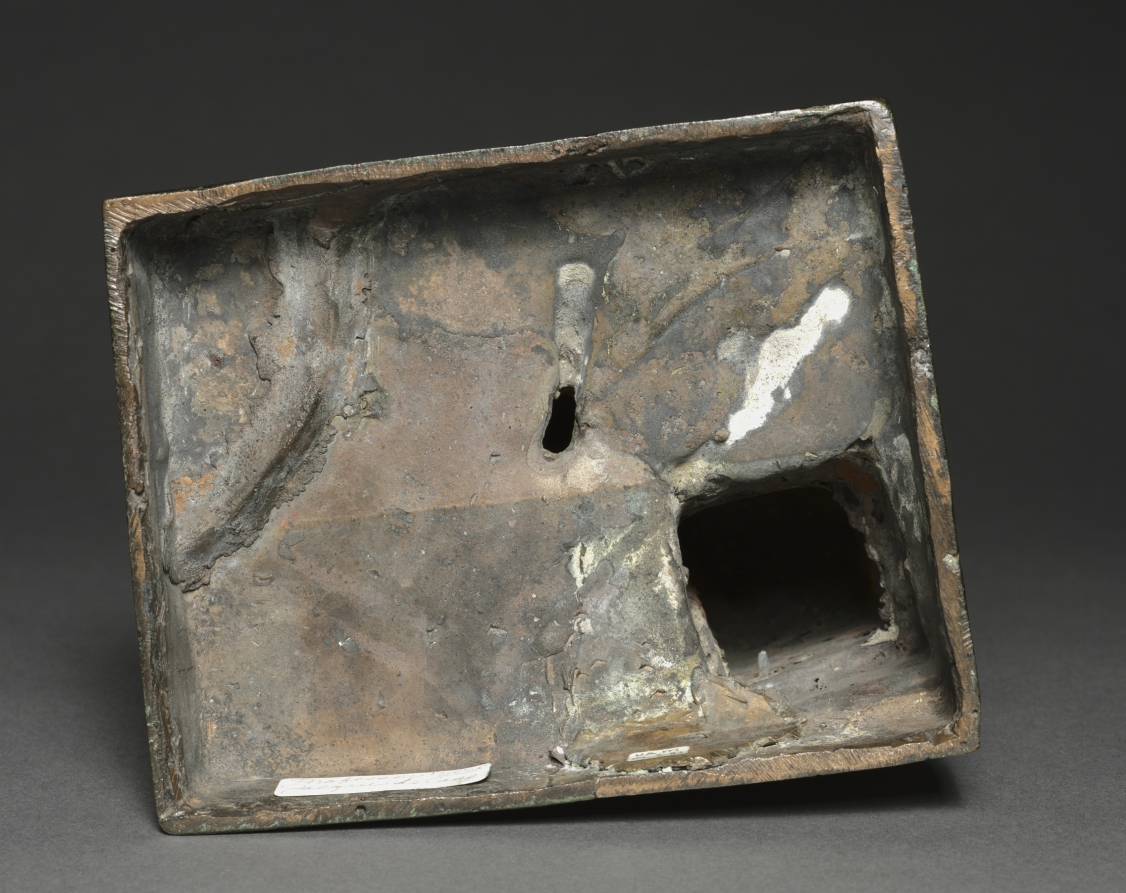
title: Portrait of Jean-Pierre-Joseph Darcet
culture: France, 19th century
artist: James Pradier (Swiss, 1790–1852)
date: 1834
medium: bronze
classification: Sculpture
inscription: signed an dated: "J. Pradier/ 1834"